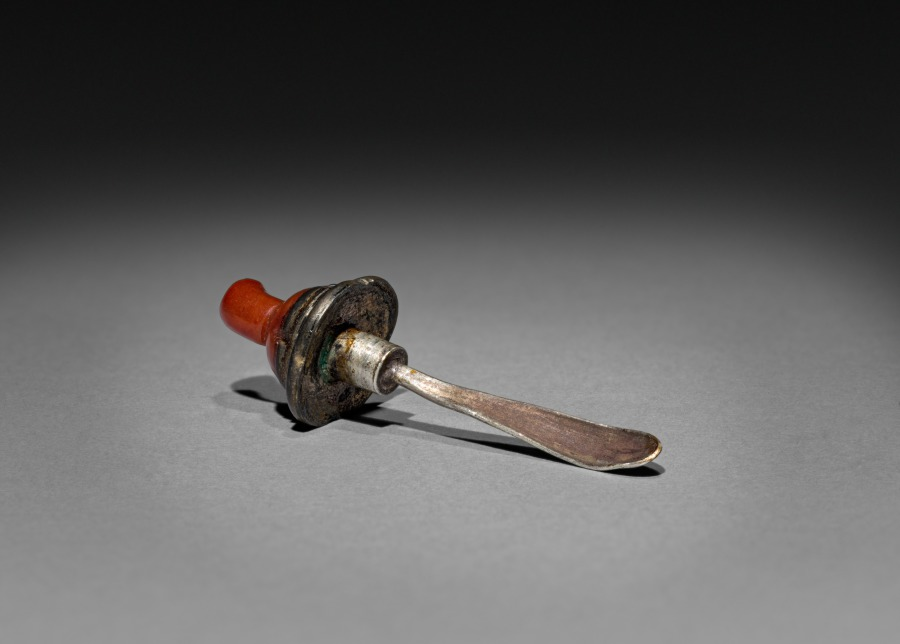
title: Snuff Bottle (stopper)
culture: China, Qing dynasty (1644-1911)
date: 1644–1911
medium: glass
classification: Glass